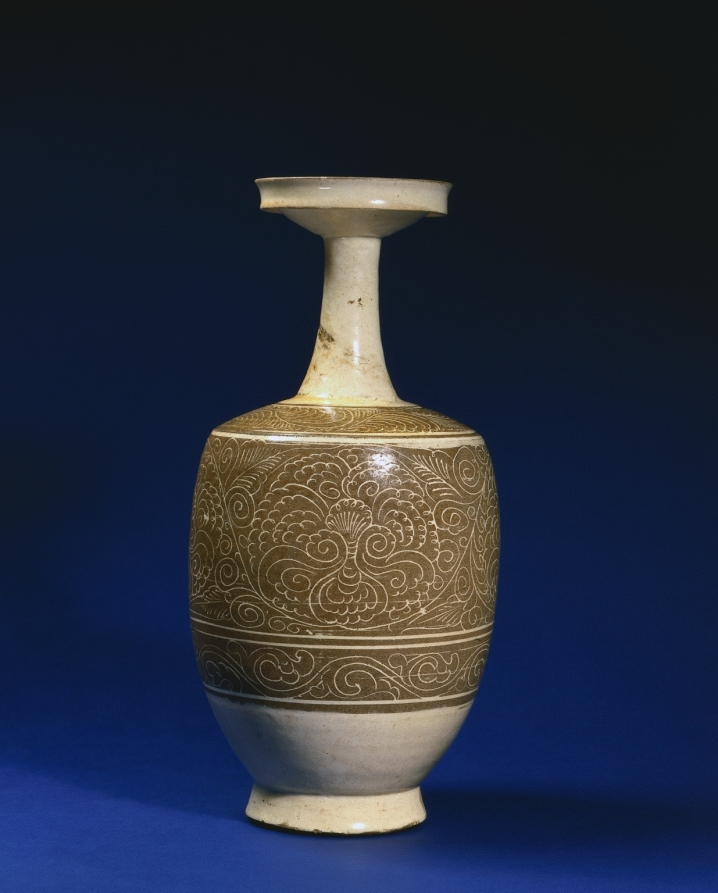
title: Vase with Floral Scrolls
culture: China, Henan province, Northern Song dynasty (960-1127)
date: 900s–1000s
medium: glazed stoneware with incised and slip-inlaid decoration, Cizhou ware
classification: Ceramic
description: Cizhou ware characteristically shows the use of slip coating, bold designs, and color contrasts to achieve stunning visual effects. This extremely rare and handsome vase is distinguished by its remarkable rhythmic execution of the floral designs achieved by the use of incised and slip-inlaid decoration. With firing, the slip coating and inlaid decoration assumed a soft ivory color whereas the exposed clay body displayed a warm cinnamon brown.